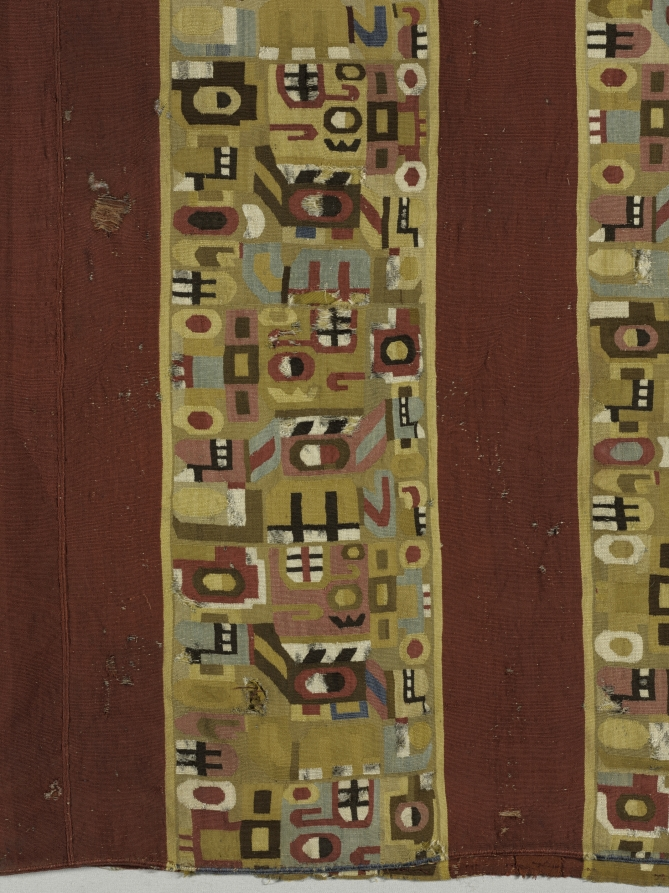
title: Tunic with Sacrificer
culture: South America, Peru, Central Andes, Middle Horizon, Wari people, 7th-11th century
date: 600–1000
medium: camelid-fiber, cotton; tapestry weave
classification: Textile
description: An extremely abstract supernatural sacrifice repeats in different colors and orientations across the body of this tunic, which was shortened on one side in antiquity. Look for the toothy black-and-white mouth in the sacrificer's upward-gazing head; other facial features include a button nose and a vertically divided eye. The figure holds the L-shaped haft of an axe behind its back and, at the front of its body, a short staff with a severed, upside-down human head on the top.